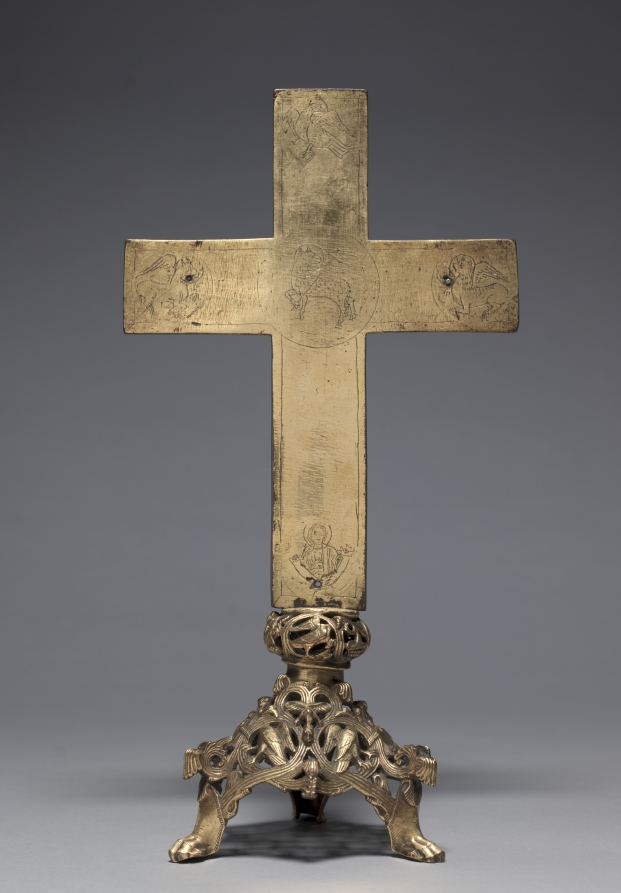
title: Altar Cross with Stand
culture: Germany, Lower Saxony, Hildesheim?, Romanesque period, 12th century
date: 1140–1150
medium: bronze: cast, gilded, engraved, and chased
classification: Metalwork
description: From the 11th century onward, altar crosses like this one often featured elaborate bases. The most impressive decoration of this cross is its stand: a lavish array of intertwining scrolls emerges from three pawlike legs, while birds perch amid the scrolls and dragon heads sprout from others.